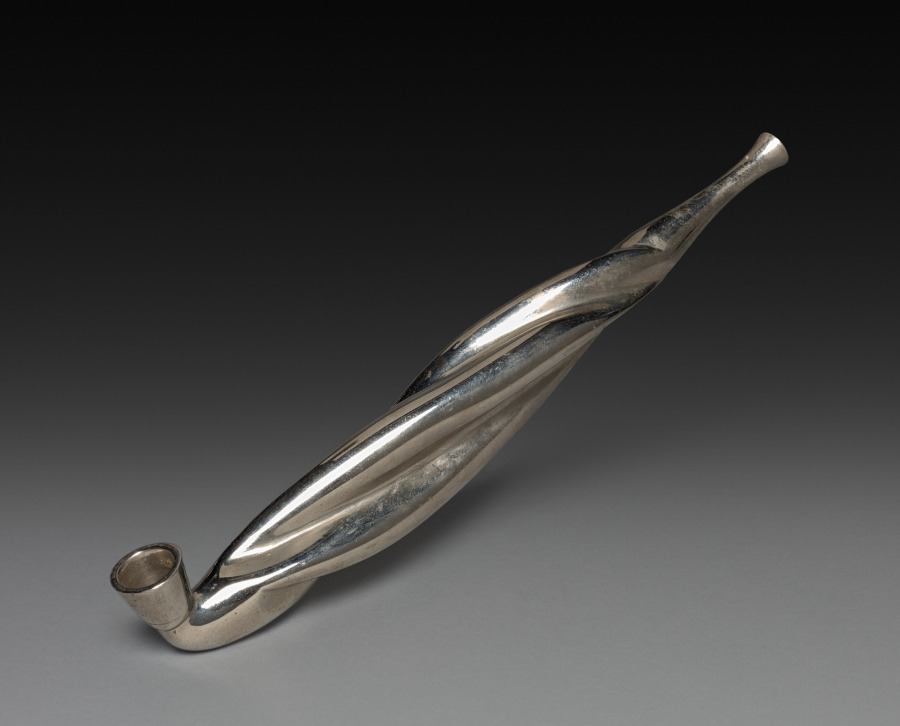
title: Tobacco Pipe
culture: Japan, Edo period (1615–1868) to Meiji period (1868–1912)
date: 1800s–early 1900s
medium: metal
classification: Miscellaneous